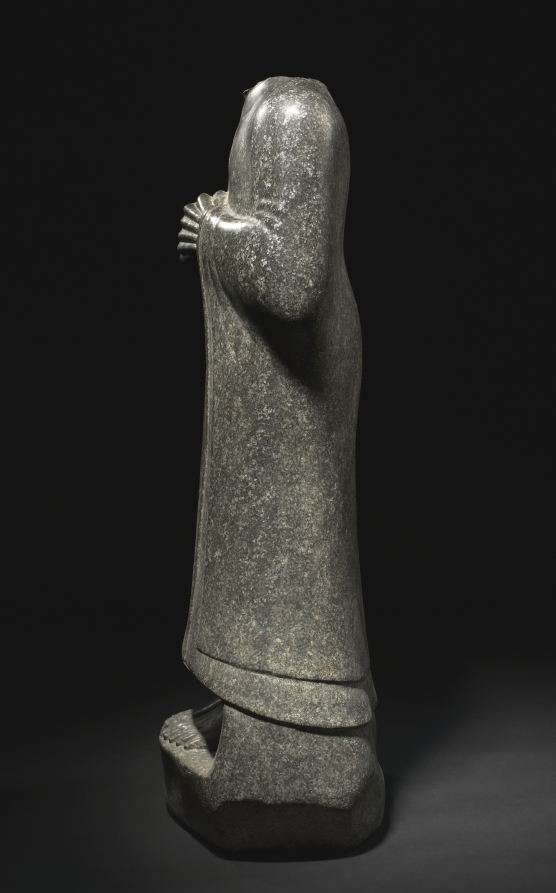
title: Statue of Gudea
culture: Mesopotamia, Neo-Sumerian, Iraq, Girsu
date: c. 2144–2124 BCE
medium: dolerite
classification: Sculpture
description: This headless figure’s clasped hands create a distinctive gesture that recurs frequently on more than 30 recorded statues of the Mesopotamian ruler Gudea. Between c. 2144–2124 BCE, Gudea ruled as ensi (governor) of the city-state of Lagash, located in modern-day Iraq. Scholars have identified more than 2,400 inscriptions that describe his reign, which included patronage of the arts and an extensive building program. Statues like this one would have been placed in temples as stand-ins for Gudea himself, demonstrating his devotion and piety.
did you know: Twice in the 20th century, this headless figure was wrongly "completed" with the head 1963.680, which comes from a similar sculpture.